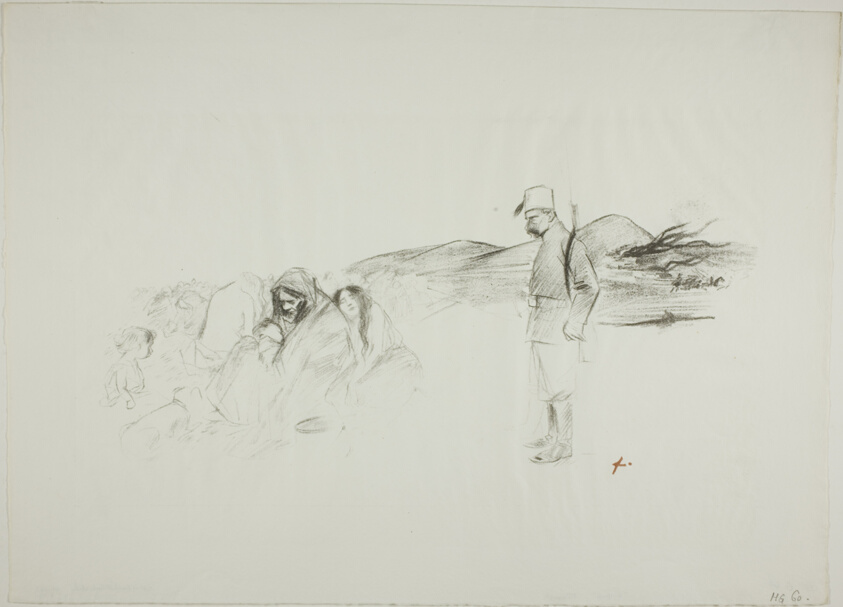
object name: Print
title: In Greece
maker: Jean Louis Forain (French, 1852-1931)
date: 1897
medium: Lithograph on white vellum paper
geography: France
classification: lithograph; print; prints and drawing